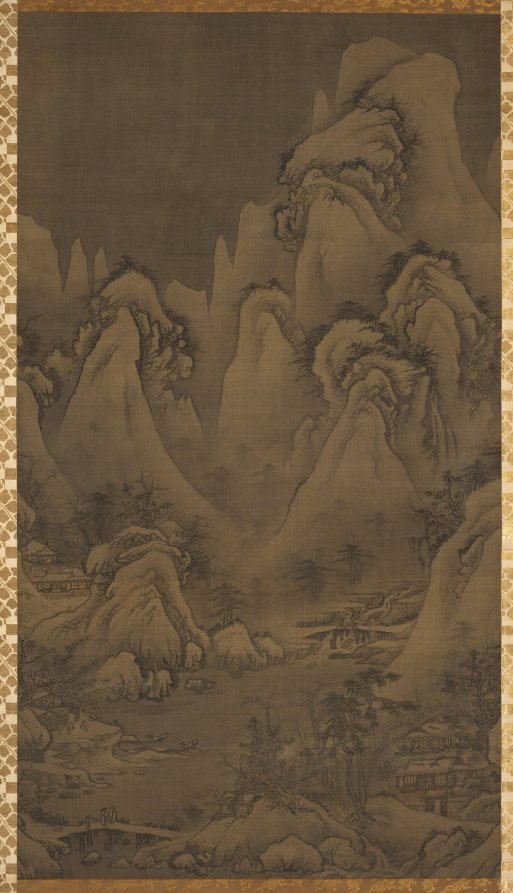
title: Winter Landscape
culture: Korea, Joseon dynasty (1392–1910)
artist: Yeoseol (Korean)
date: 1500s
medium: hanging scroll; ink and slight color on silk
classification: Painting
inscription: seal reading Nyosetsu in upper right corner.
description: This wintry vista is a vivid example of idealistic monumental painting: the strong contrasts of ink washes and contouring brush lines; the bold outlining of rock shapes and tree trunks; and the many short, twisting brushstrokes that build up the surfaces of the rocks. Much of the painting’s appeal can be attributed to the dynamic lines and contrasting tonal patterns that lead the viewer’s eye from the lower foreground toward the cold mountain peaks in the distance. In the corner is a seal that reads "Yeoseol," meaning "Snow-Like."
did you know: This wintry scenery was mainly painted in monochrome ink, but some details like the rider's horse saddle and the servant's carrier attest the use of light blue pigment.